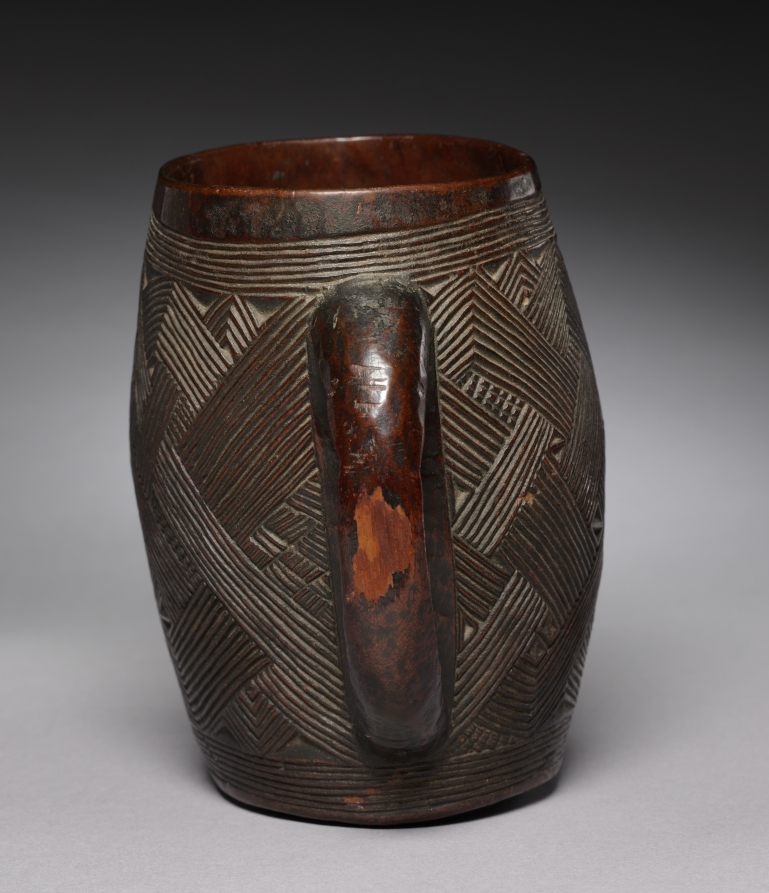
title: Cup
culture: Democratic Republic of the Congo, Kuba, 20th century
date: 1900s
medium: Wood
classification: Vessels